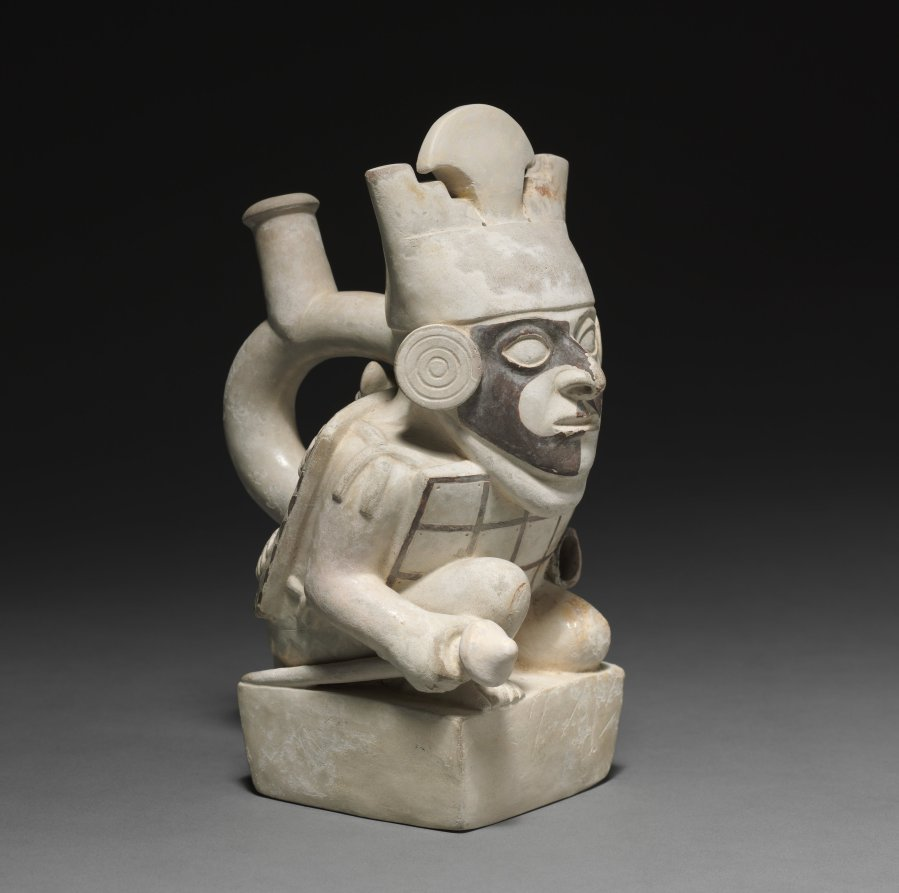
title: Warrior Vessel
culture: Peru, North Coast, Moche, Moche style (50-800)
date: c. 50–200 CE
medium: earthenware with colored slips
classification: Ceramic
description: This vessel's exquisite, crisp detail rewards careful viewing. The modeling of the feline pelt on the back is especially delicate and sharp, and each of the squares on the tunic carries a tiny dot in the upper corners, as though the squares represent plates of metal or shell attached to fabric. The face is decorated with paint or tattooing, and the headdress supports a curved, blade-shaped form.